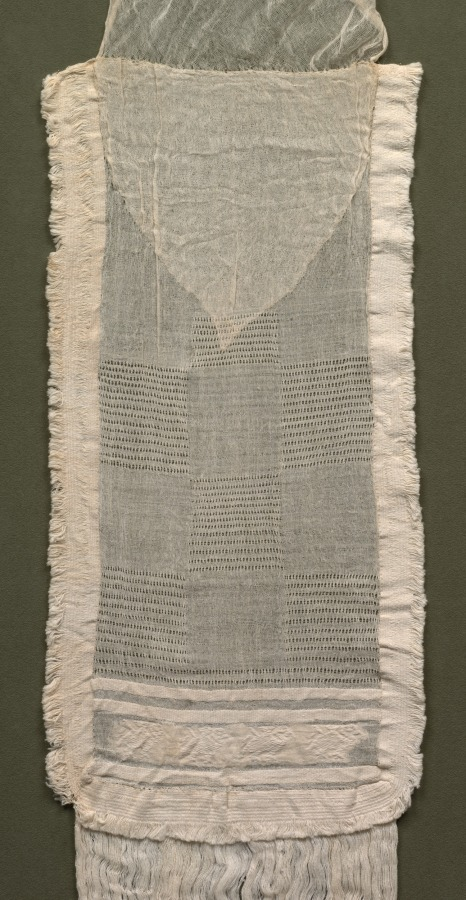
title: Turban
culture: Peru, North Coast, Chimú style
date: 1485–1640 (radiocarbon date, 95.4% probability)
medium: Cotton; plain weave, brocaded and complex alternating gauze with 5 shots of plain weave between gauze shots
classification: Garment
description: Chimú garments like this one consist of a large, rectangular central section—here measuring some 65 inches by 50 inches—with decorated tabs stitched to two opposite corners. Such garments probably were worn as turbans but we do not understand exactly how. For the purpose of display, the plain central section of this example has been folded to form a wide band, with the tabs arranged on either side.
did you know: The white cotton yarns used to make this textile are only 0.1 to 0.2 millimeters in diameter.